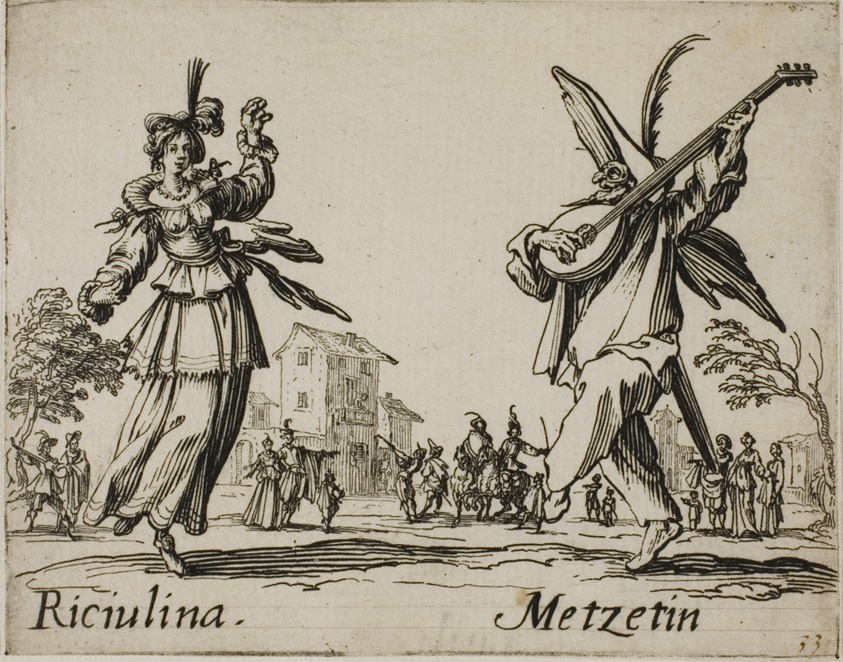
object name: Print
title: Riciulina - Metzetin, plate 8 from Balli di Sfessania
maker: Jacques Callot (French, 1592-1635)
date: c. 1622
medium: Etching and engraving on paper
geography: France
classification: etching; print; prints and drawing